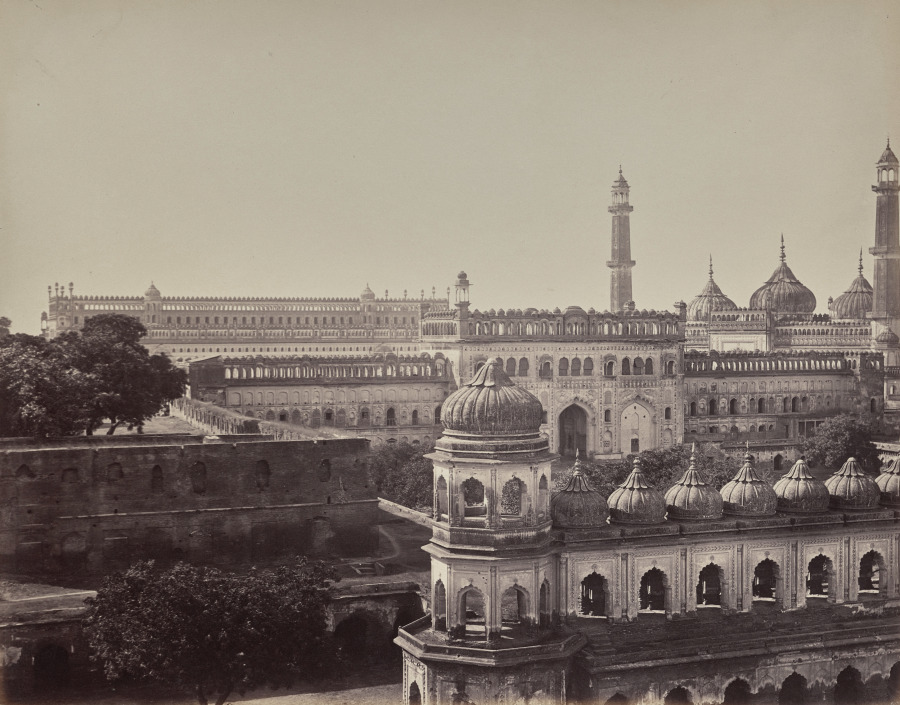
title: Lucknow. The Great Emambara and Mosque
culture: England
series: Photographs of Northern India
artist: Samuel Bourne (British, 1834–1912)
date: 1863–70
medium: albumen print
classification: Photograph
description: The 50 images in this album, all taken in the 1860s, move from the hill towns of the Himalayas down to cities including Lahore (now in Pakistan), Delhi, Lucknow, Agra, Benares (now Varansi), and Calcutta (now Kolkata). Architectural studies of major monuments offer valuable historical records of what sites such as the Taj Mahal and the imperial mosque of the Mughal emperors in Delhi looked like before twentieth-century restorations.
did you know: Samuel Bourne, the author of most the images in this album, was a banker in England before he moved to India to become a professional photographer.